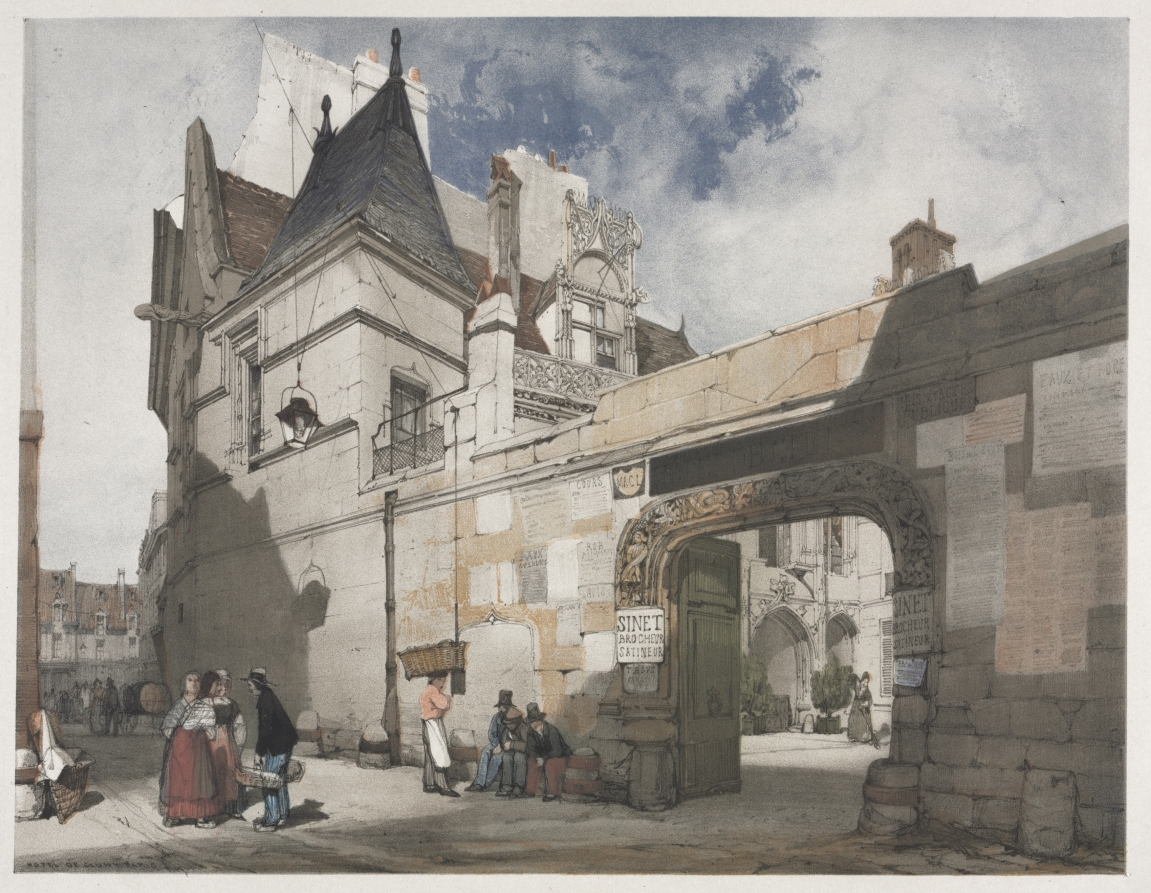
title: Picturesque Architecture in Paris, Ghent, Antwerp, Rouen: Hôtel de Cluny, Paris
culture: England, 19th century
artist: Thomas Shotter Boys (British, 1803–1874)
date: 1839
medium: lithograph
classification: Portfolio